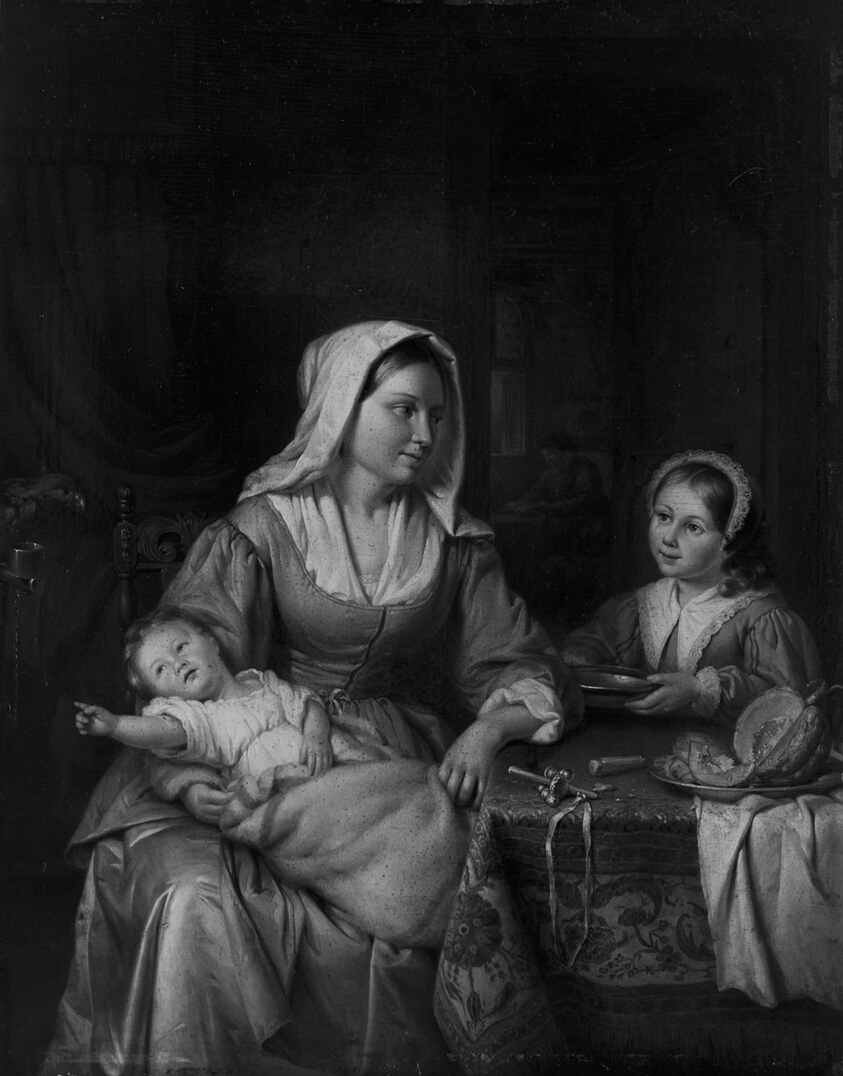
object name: Painting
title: Mother and Two Children with Still Life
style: nineteenth century, 19th century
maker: Adriaen de Lelie (Dutch, 1755–1820)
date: 1810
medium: Oil on panel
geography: Holland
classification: oil on panel; paint; oil paintings (visual works); dutch; painting; european painting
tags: mothers, babies, chair, daughters, domestic, families, food, fruit, interior, table, toys, woman, children